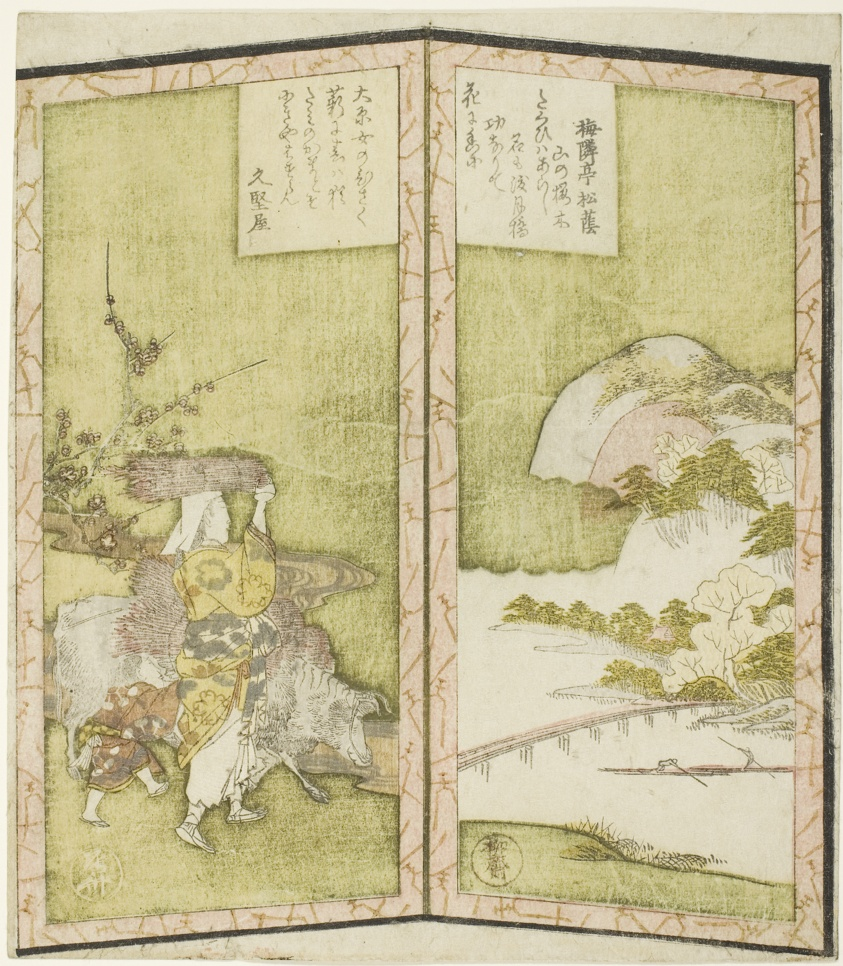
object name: Print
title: Landscape and Oharame (a woman from Ohara), from an untitled hexaptych depicting a pair of folding screens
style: Japanese (culture or style)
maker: Ryuryukyo Shinsai (Japanese, c. 1764-1820)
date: c. 1825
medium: Color woodblock print; sheet from shikishiban hexaptych, surimono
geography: Japan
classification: woodblock print; print; asian art